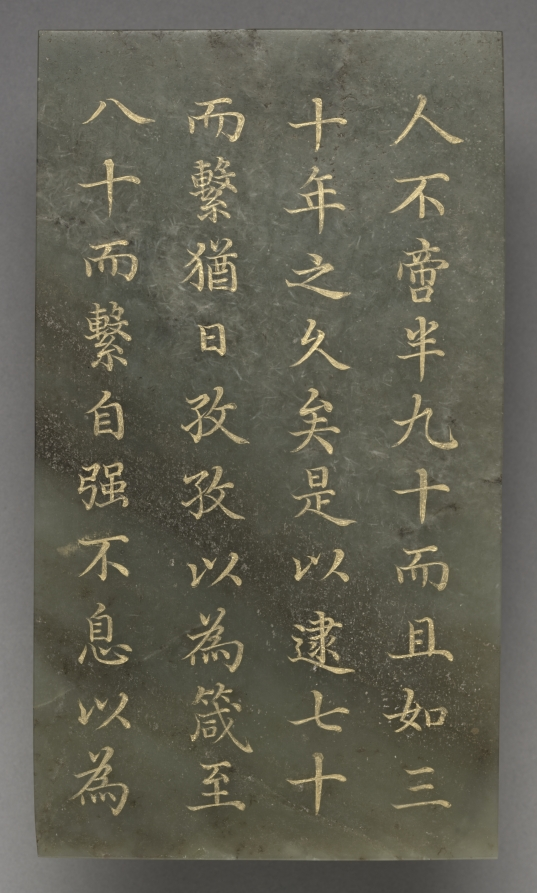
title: Tablet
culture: China, Qing dynasty (1644–1911), Qianlong reign (1736–95)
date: 1778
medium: jade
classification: Jade